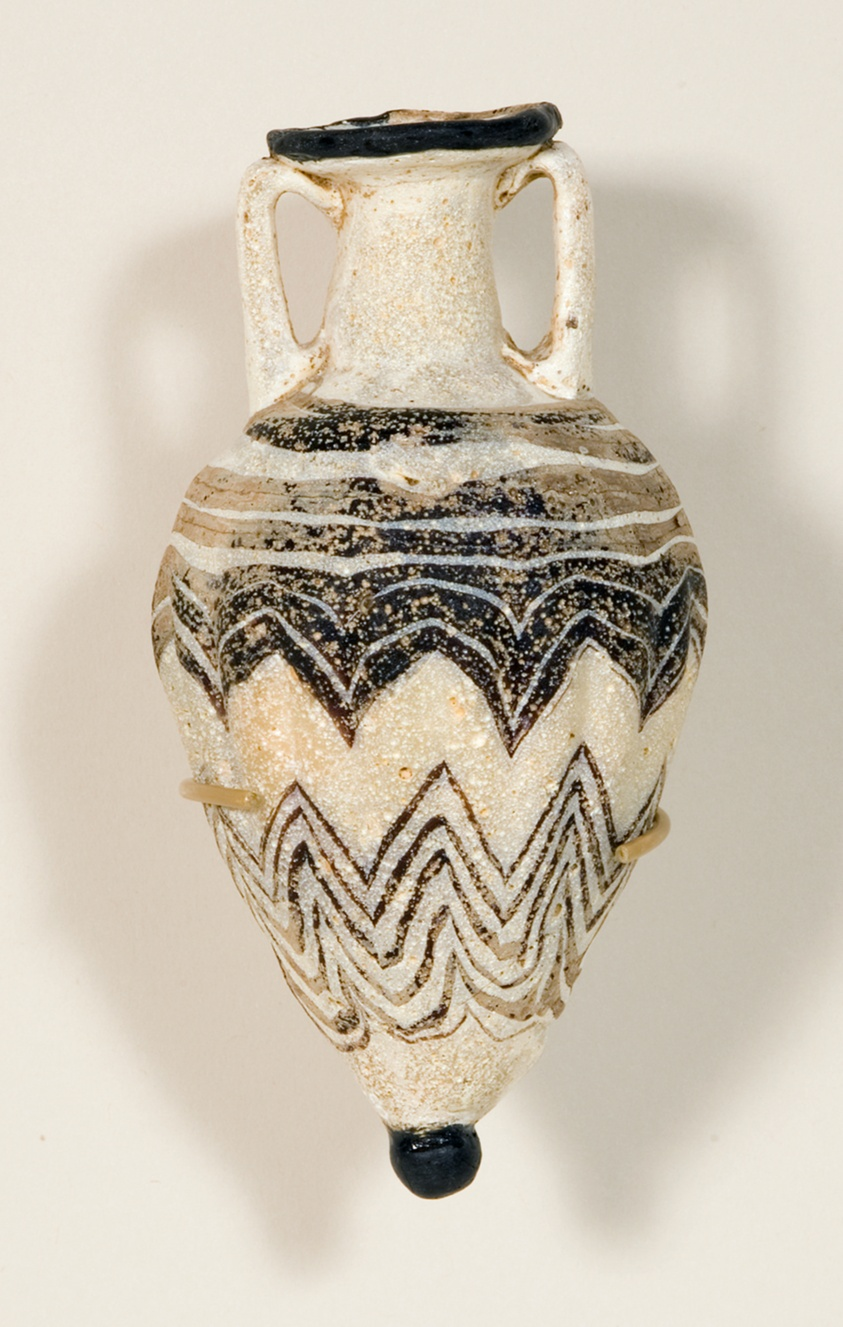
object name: Vessel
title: Amphoriskos (Container for Oil)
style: ancient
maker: Eastern Mediterranean, possibly from Rhodes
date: late 6th-5th century BCE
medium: Glass, core-formed technique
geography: Ródhos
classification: container; amphoriskos; glass; vessel; ancient art